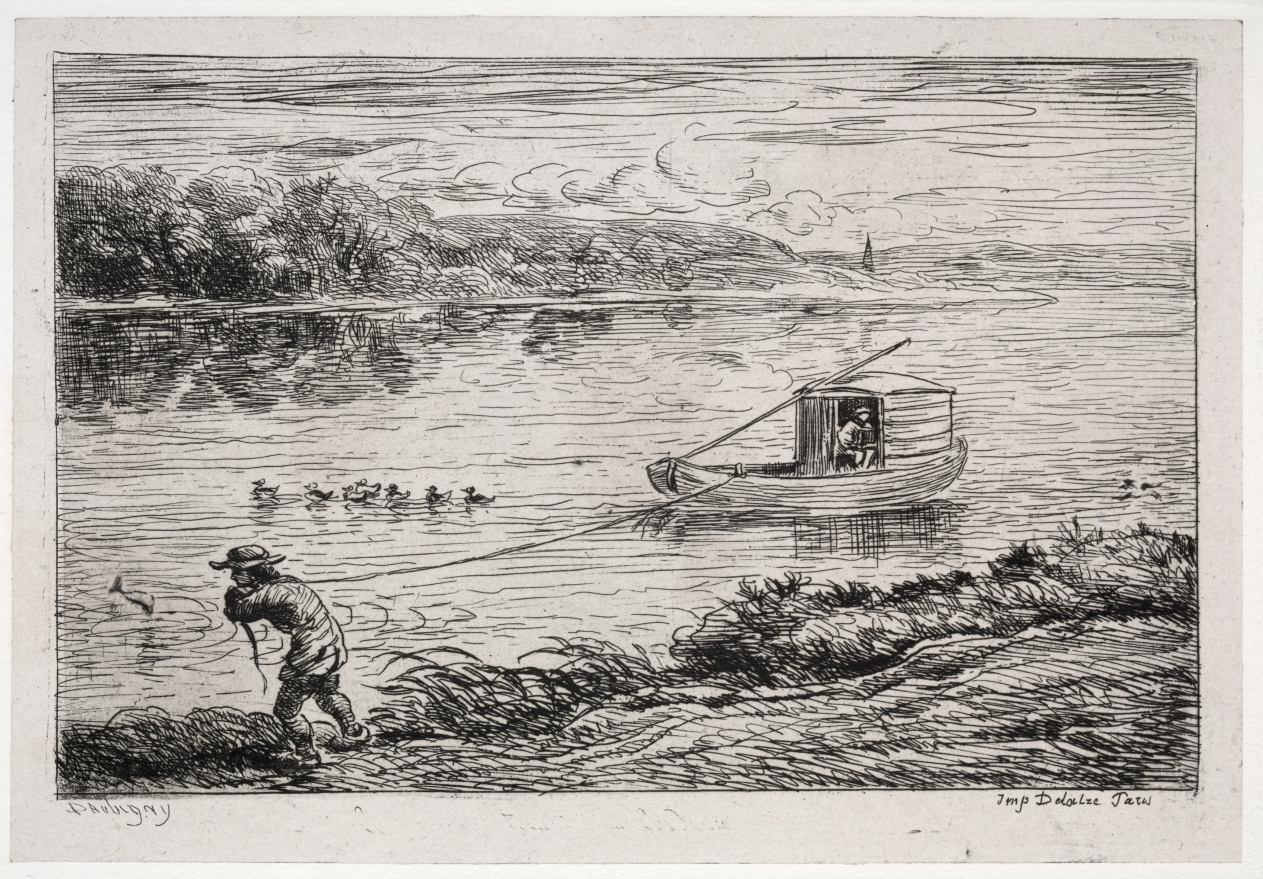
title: The Boat Trip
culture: France, 19th century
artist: Charles François Daubigny (French, 1817–1878)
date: 1861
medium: 16 etchings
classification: Portfolio